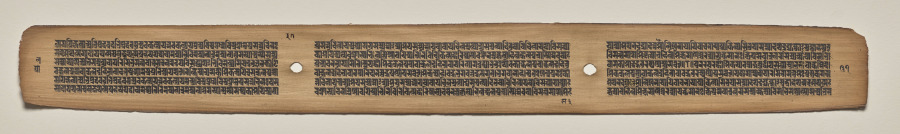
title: Text, Folio 37 (verso), from a Manuscript of the Perfection of Wisdom in Eight Thousand Lines (Ashtasahasrika Prajnaparamita-sutra)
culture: Eastern India, Bihar, Vikramashila Monastery. Painting: Nepal, Kathmandu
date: Sunday, September 14, 1119 (year 239 of the Newar Samvat in the month of Ashvina)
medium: gum tempera and ink on palm leaves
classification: Painting